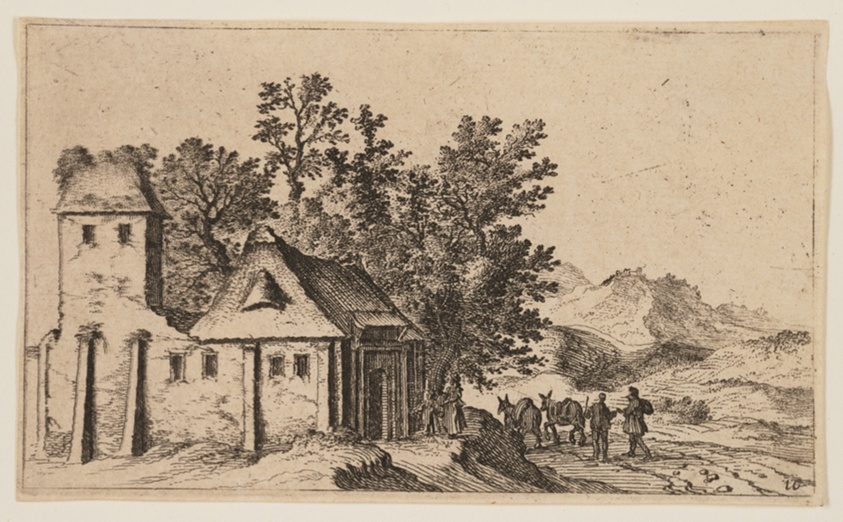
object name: Print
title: Farm before Trees in Hilly Country, from Twelve Landscapes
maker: Gillis van Scheyndel (Dutch, 1595–1660)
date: c. 1605-1650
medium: Etching on ivory laid paper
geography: Netherlands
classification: etching; paper; print; prints and drawing